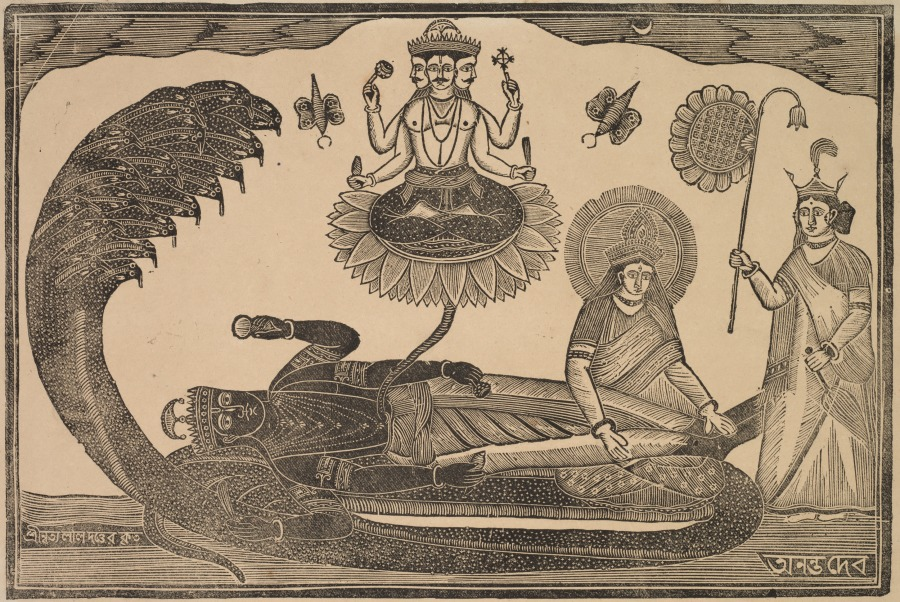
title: Anantasayan (Vishnu Reclining on Serpent Ananta)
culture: Eastern India, Bengal, Kolkata, Kalighat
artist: Shri Gobinda Chandra Roy (Indian, active late 1800s)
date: c. 1890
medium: woodcut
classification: Print